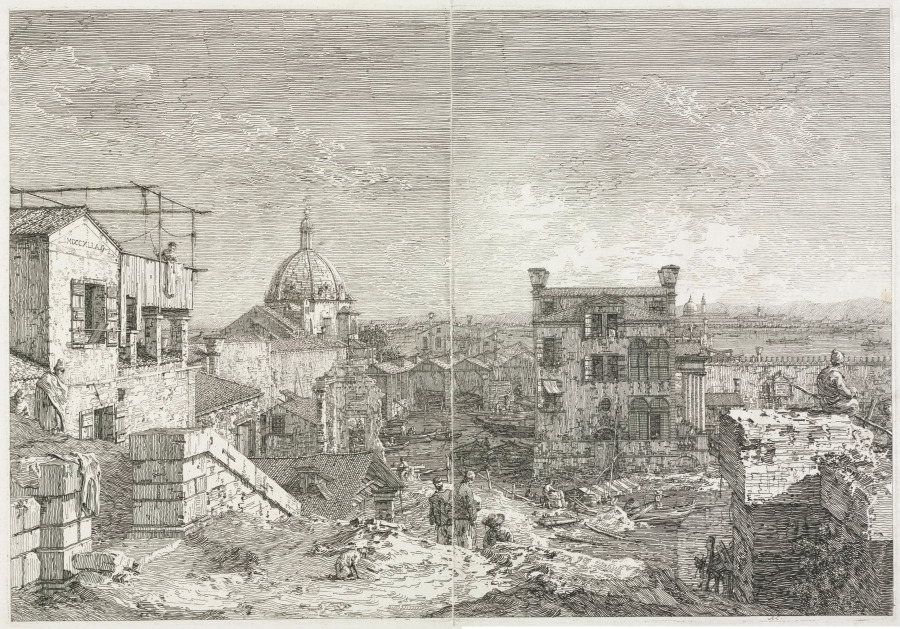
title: Views: A House Surrounded by Six Columns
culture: Italy, Venice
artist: Antonio Canaletto (Italian, 1697–1768)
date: 1735–1746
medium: etching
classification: Print